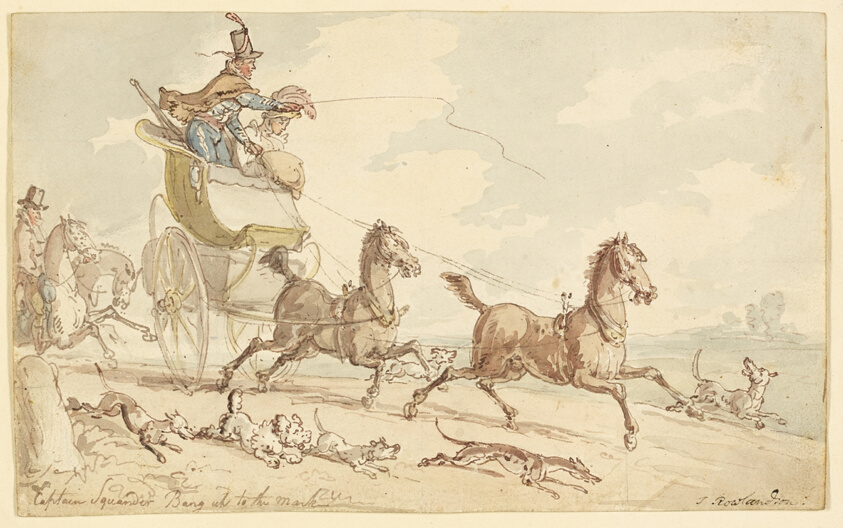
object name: Drawing and Watercolor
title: Captain Squander Bang Up to the Mark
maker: Thomas Rowlandson (English, 1756-1827)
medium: Pen and brown ink with brush and watercolor, over graphite, on cream wove paper, tipped onto cream wove paper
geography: England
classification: watercolor; drawings (visual works); prints and drawing